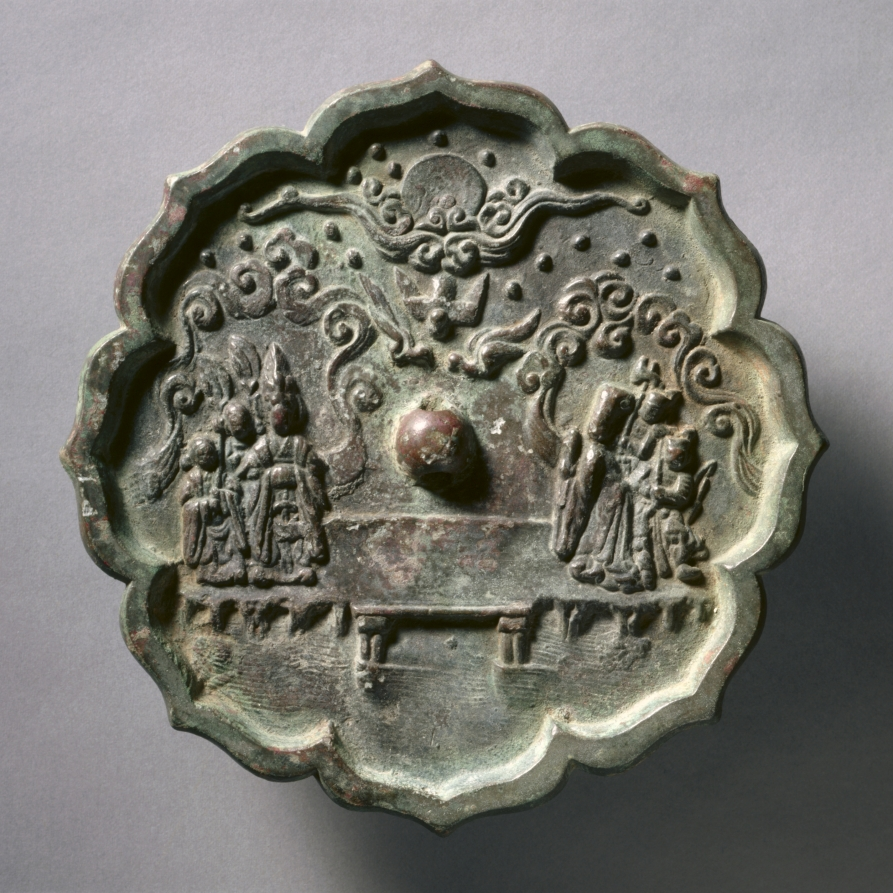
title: Octafoil Mirror with Legend of Herdboy and Weaver Maid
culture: China, Song dynasty (960-1279)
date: mid-900s-late 1200s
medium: bronze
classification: Metalwork